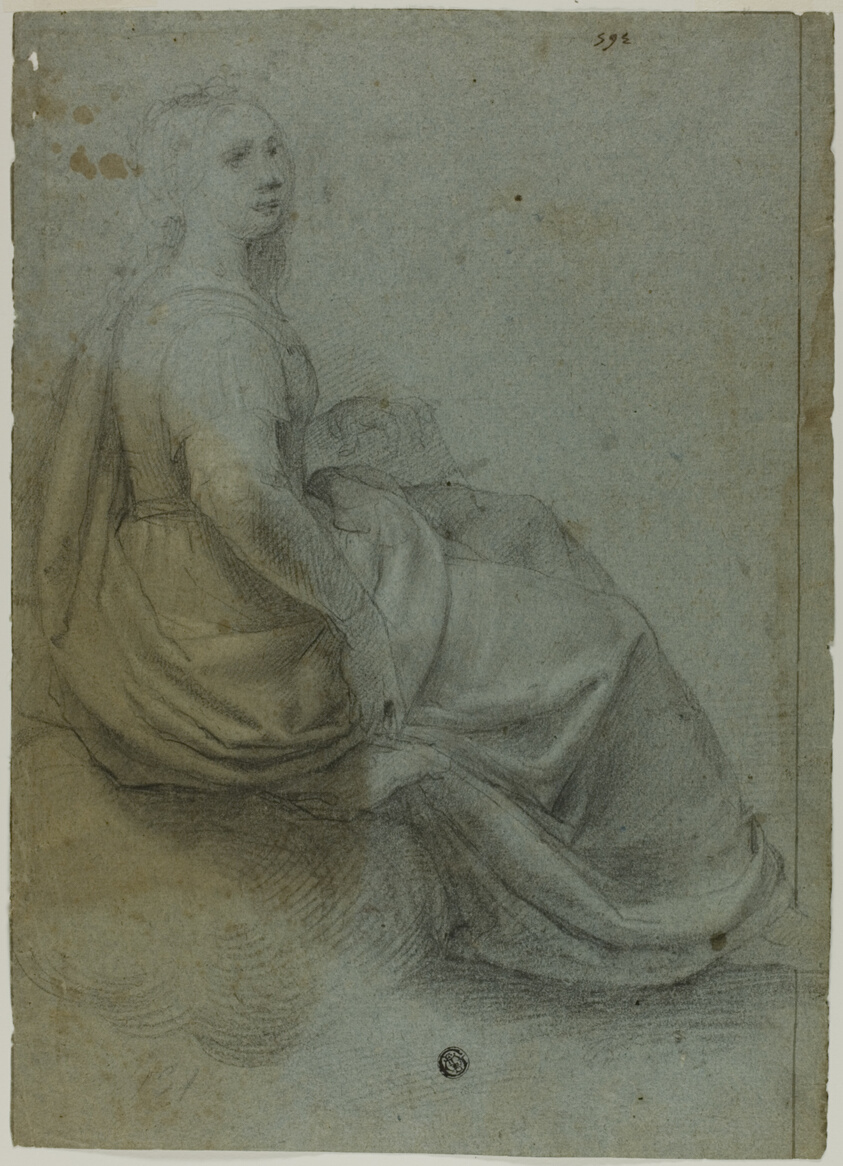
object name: Drawing and Watercolor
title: Seated Woman in Profile, to Right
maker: Probably Domenico Fiasella (Italian, 1589-1669); or possibly Agostino Carracci (Italian, 1557-1602)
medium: Black chalk, heightened with touches of white chalk, on blue laid paper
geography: Italy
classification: graphite; drawings (visual works); prints and drawing